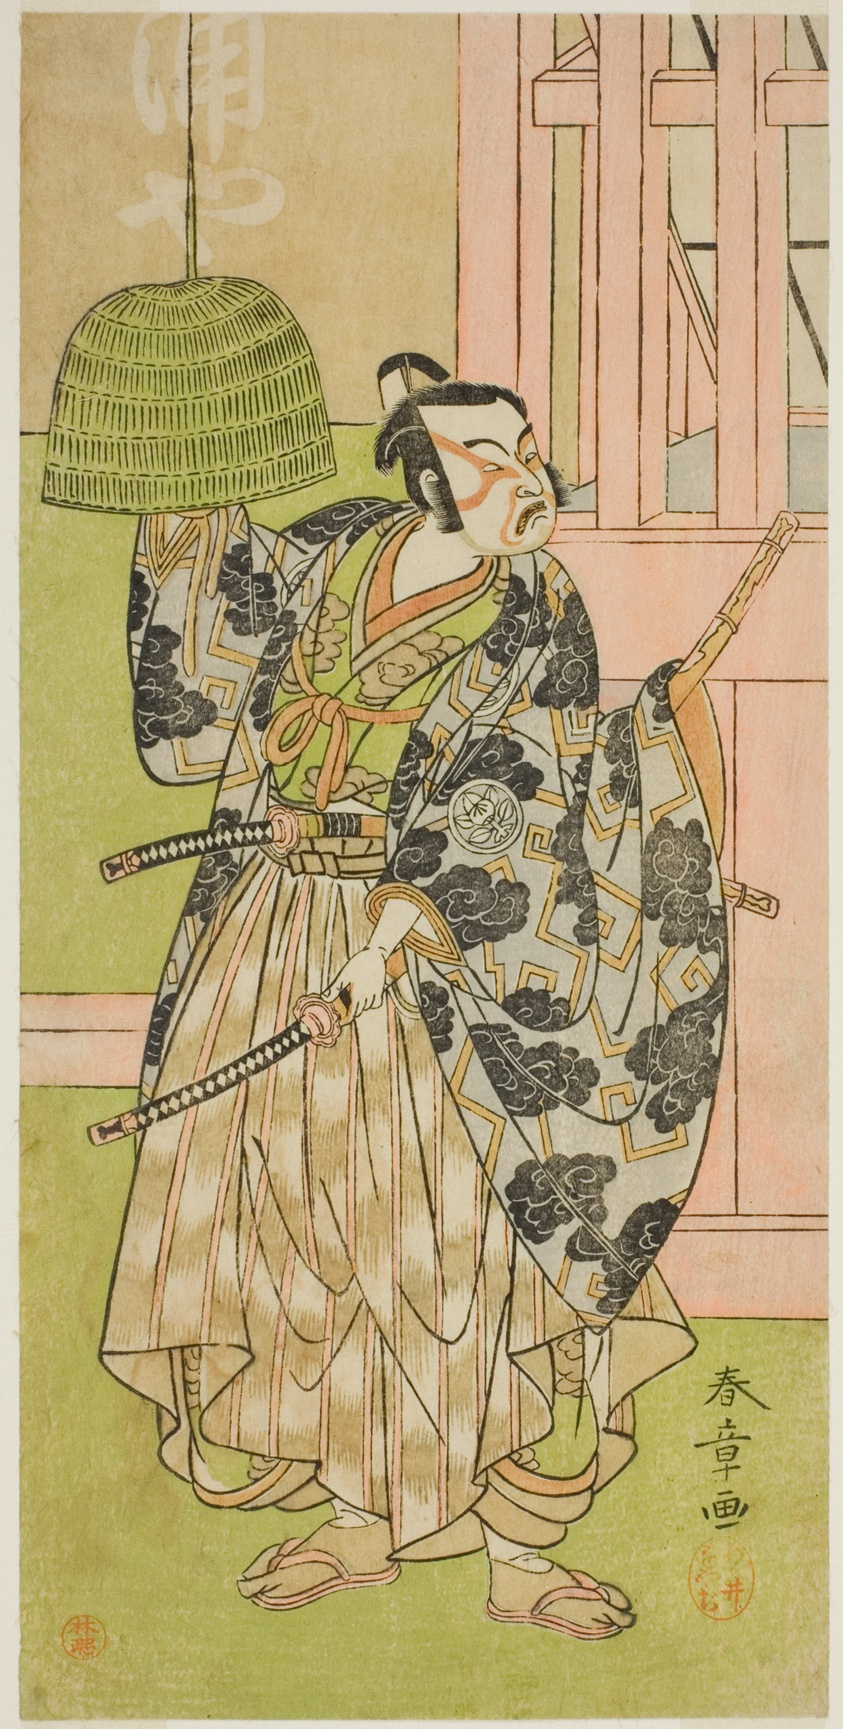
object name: Print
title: The Actor Ichimura Uzaemon IX as Fuwa Banzaemon in the Play Keisei Nagoya Obi, Performed at the Ichimura Theater in the Eighth Month, 1771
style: Japanese (culture or style)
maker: Katsukawa Shunsho 勝川 春章; Japanese, 1726-1792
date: c. 1771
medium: Color woodblock print; hosoban; from a multisheet composition (?)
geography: Japan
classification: print